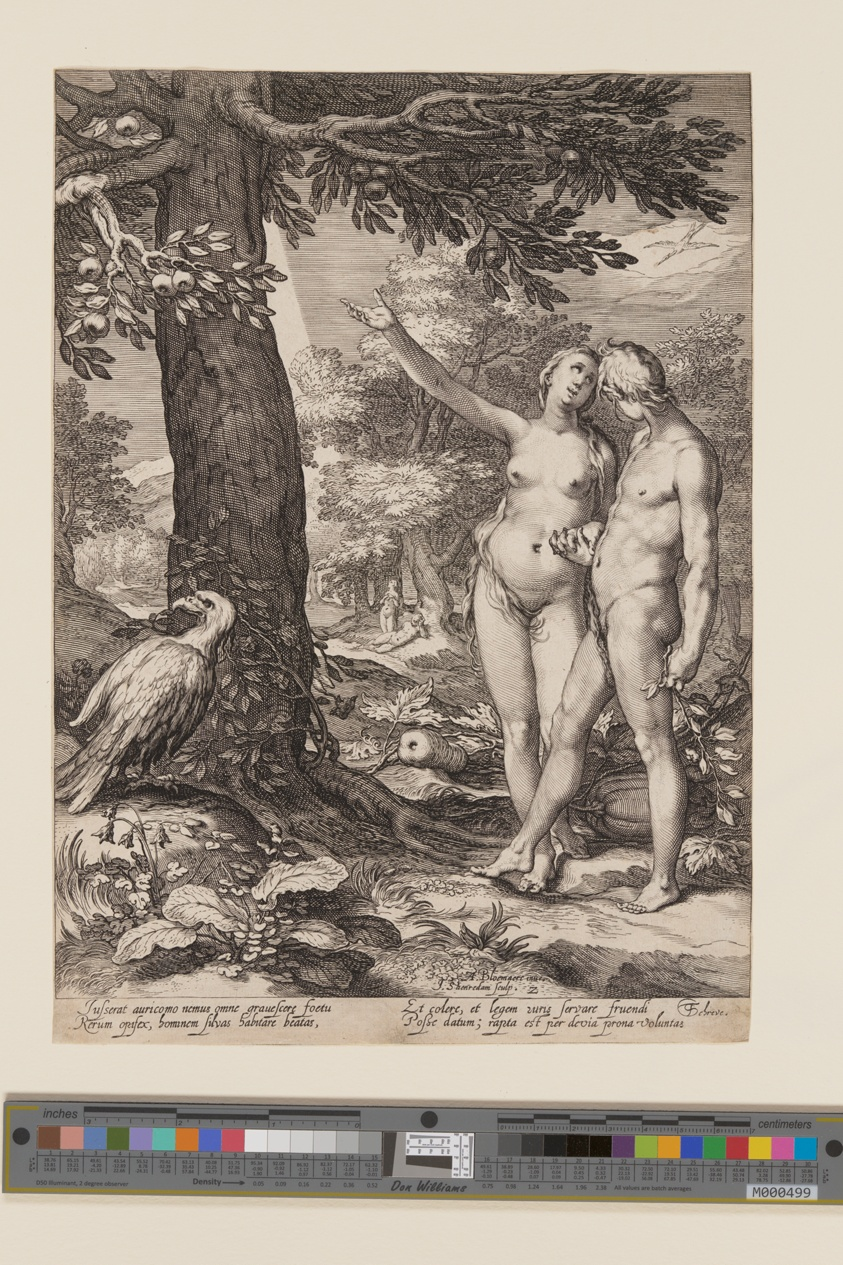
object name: Print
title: Adam and Eve before the Tree of Knowledge, from History of the First Parents of Man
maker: Jan Saenredam (Dutch, 1565–1607); after Abraham Bloemaert (Dutch, 1566–1651)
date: 1604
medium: Engraving on ivory laid paper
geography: Netherlands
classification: engraving; paper; print; prints and drawing